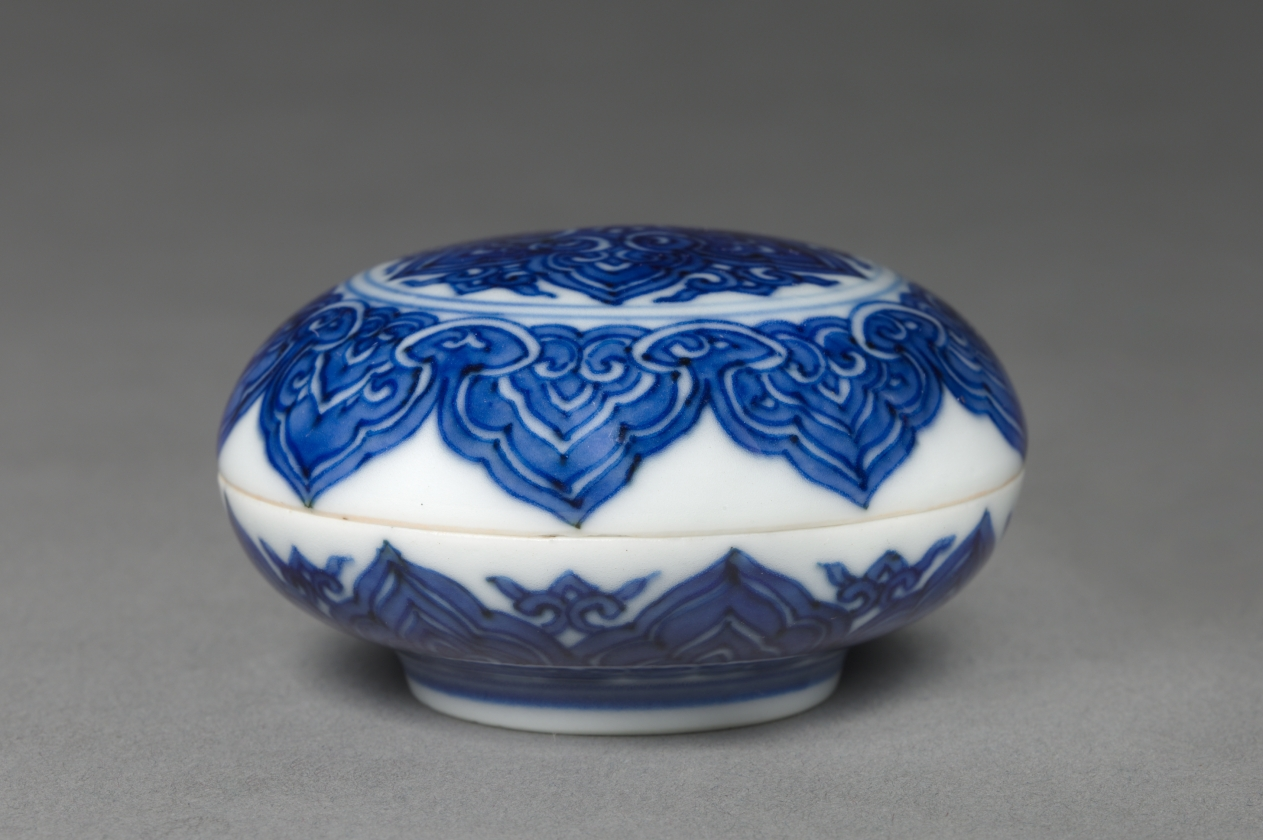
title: Round Covered Box with Medallions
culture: China, Jiangxi province, Jingdezhen kilns, Ming dynasty (1368-1644), Jiajing mark and reign (1522-66)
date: 1522–66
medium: porcelain with underglaze blue decoration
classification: Ceramic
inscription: 大明嘉靖年製